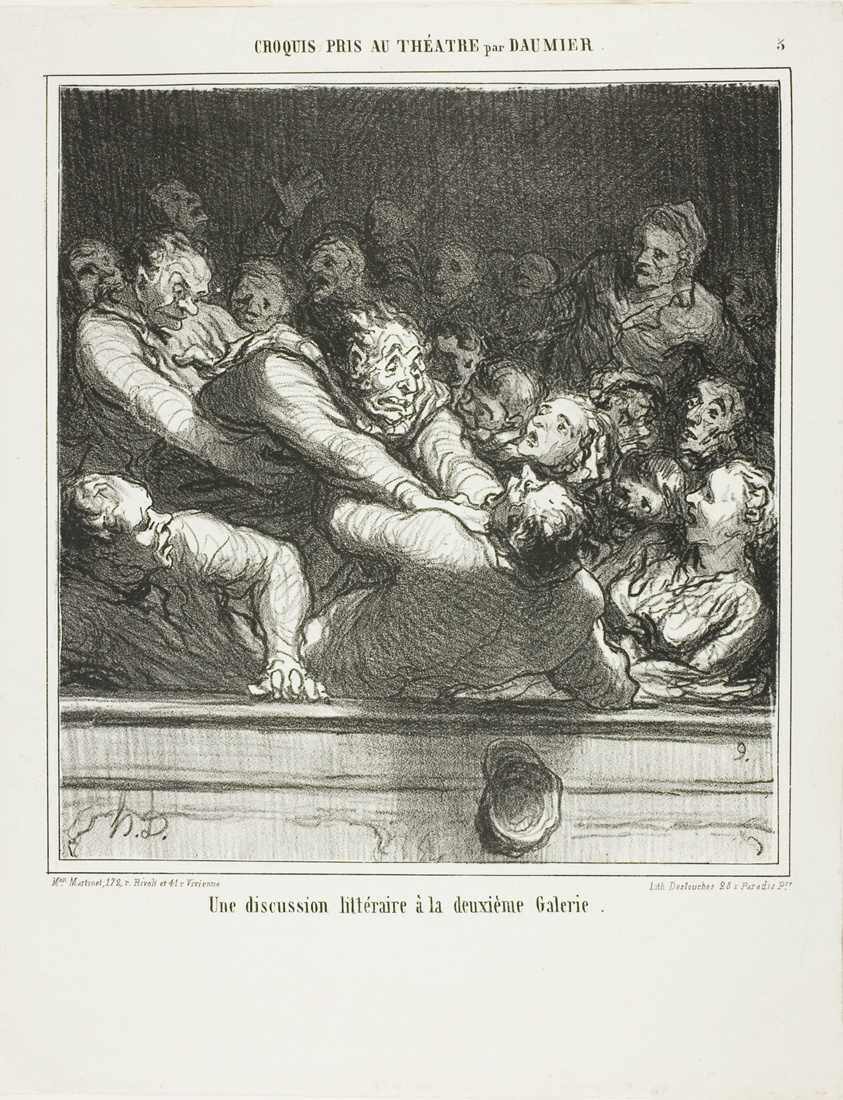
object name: Print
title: A literary argument on the second tier, plate 3 from Croquis Pris Au Théatre par Daumier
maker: Honoré Victorin Daumier; French, 1808-1879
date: published February 27, 1864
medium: Lithograph in black on ivory wove paper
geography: France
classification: lithograph; print; prints and drawing